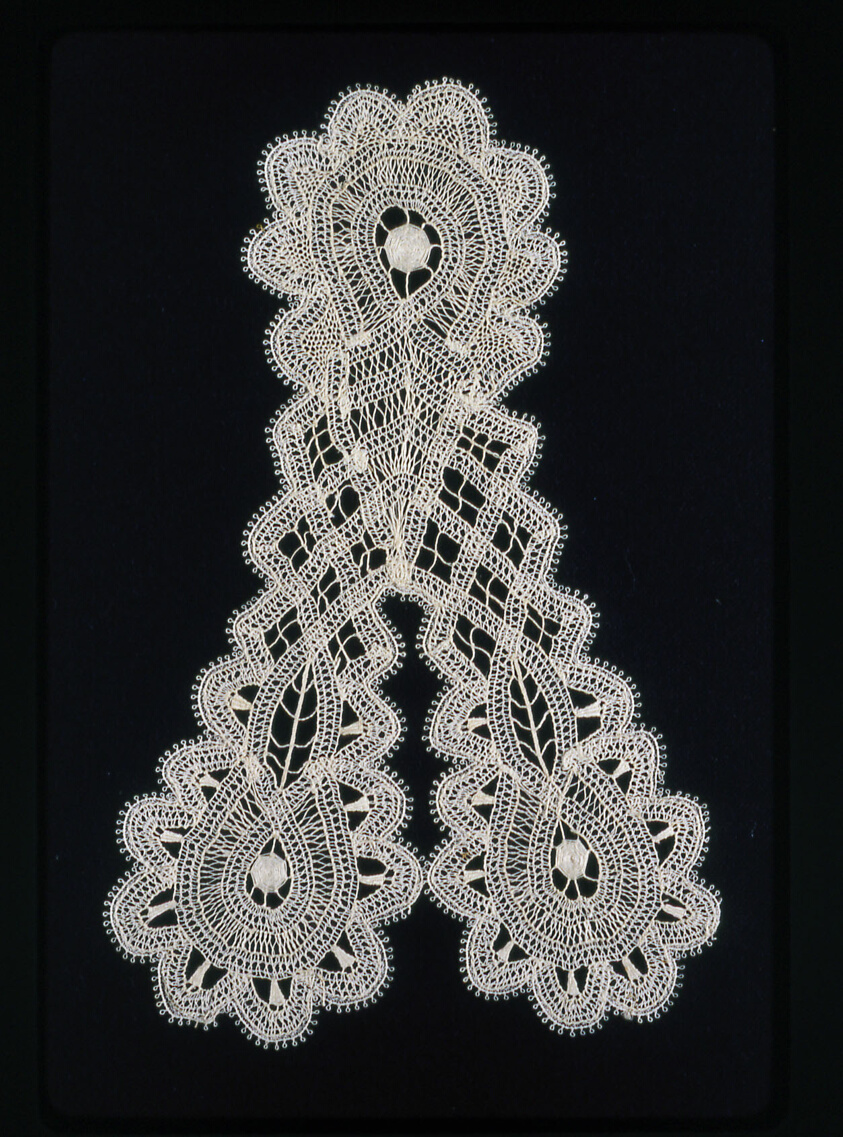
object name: Textile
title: Jabot and Three Border Fragments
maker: United States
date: 1876/78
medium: Mixed lace of cotton, bobbin tape lace and linen, needle lace fillings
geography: United States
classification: textile; lace - mixed; lace